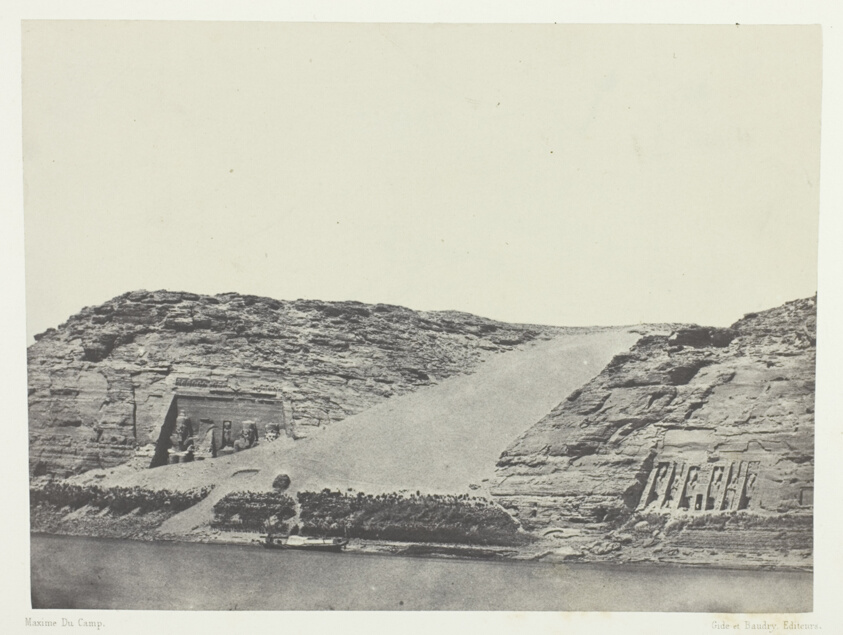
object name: Photograph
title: Ibsamboul, Les Deux Spéos; Nubie, plate 101 from the album "Egypte, Nubie, Palestine et Syrie" (1852)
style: 19th century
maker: Maxime Du Camp (French, 1822–1894)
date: 1849/51, printed 1852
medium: Salted paper print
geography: France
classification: salted paper print; photographic process; photography; photograph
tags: Collected by Hugh Edwards, Egypte, Nubie, Palestine et Syrie